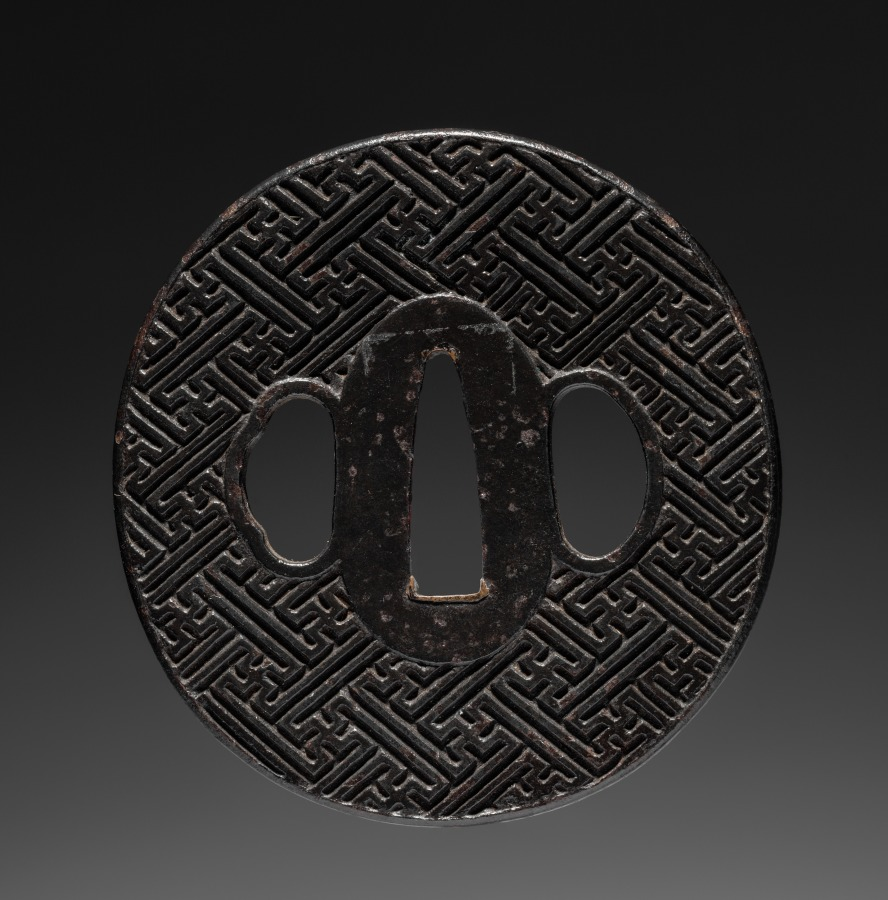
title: Sword Guard (Tsuba)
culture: Japan, possibly Edo period (1615-1868)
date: c. 1615–1868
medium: iron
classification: Arms and Armor